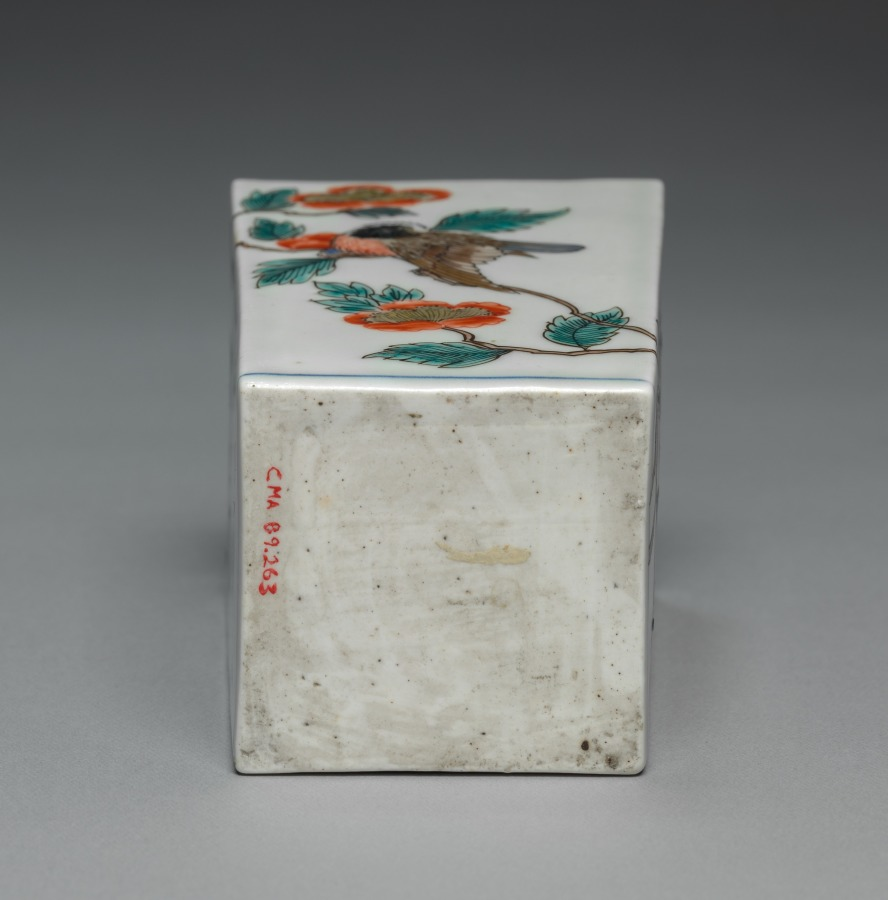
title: Bottle with Bird and Butterfly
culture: Japan, Edo period (1615–1868)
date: late 1600s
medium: porcelain with underglaze blue and overglaze color enamel and gold (Hizen ware, Ko-Imari type)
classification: Ceramic